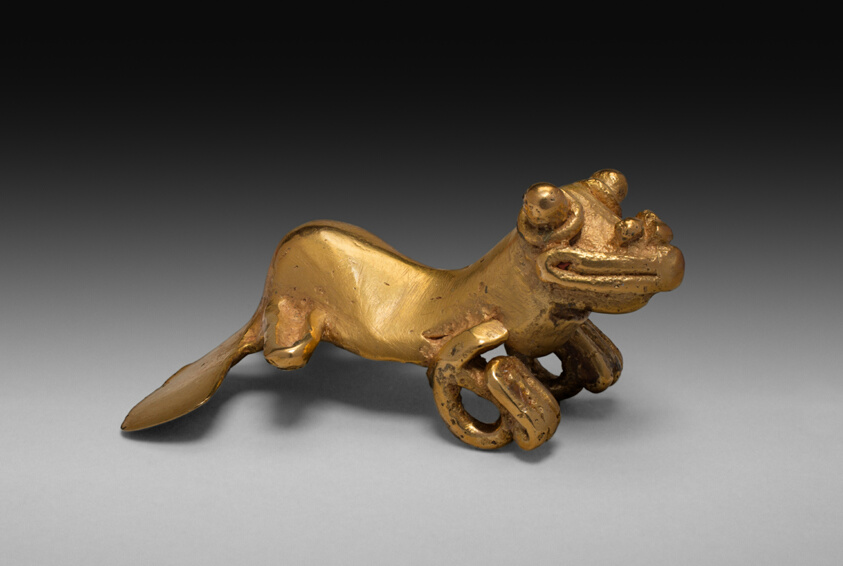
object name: Costume and Accessories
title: Pendant in the Form of a Frog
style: veraguas, Arts of the Americas, lower central america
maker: Veraguas (Panama)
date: 1000–1500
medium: Gold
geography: Panama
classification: pendant (jewelry); metal; jewelry; costume; art of the americas